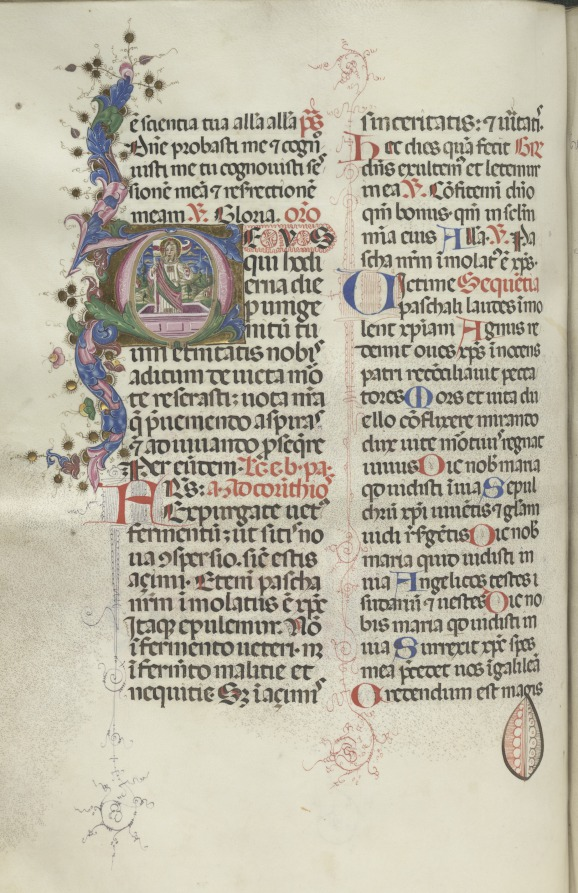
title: Missale: Fol. 192v: Resurrection of Christ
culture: Italy, Perugia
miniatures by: Bartolommeo Caporali (Italian, c. 1420–1503)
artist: assisted by Giapeco Caporali (Italian, d. 1478)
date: 1469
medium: ink, tempera and burnished gold on vellum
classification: Bound Volume